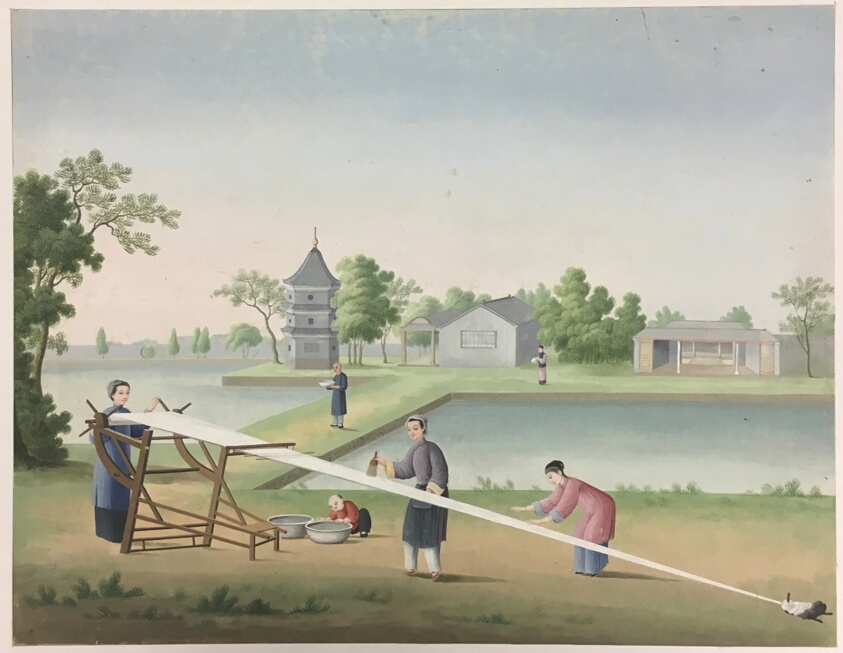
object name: Painting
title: Spinning Cloth, Preparing Tea Leaves, Preparing Silk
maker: China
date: Early 19th century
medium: Colors on paper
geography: China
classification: painting; asian art; print